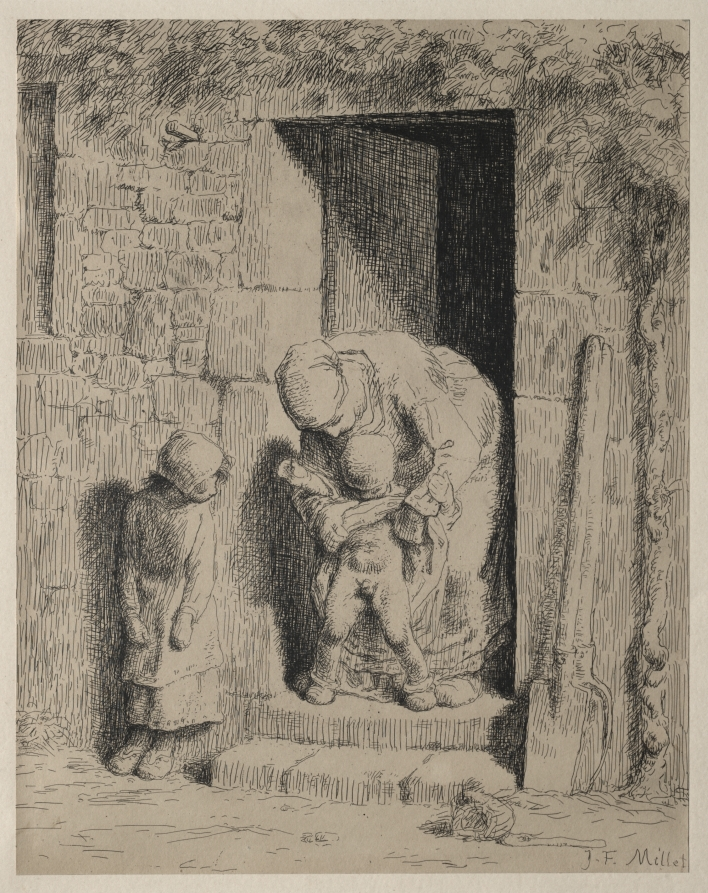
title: The Maternal Precaution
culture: France, 19th century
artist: Jean-François Millet (French, 1814–1875)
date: 1860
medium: cliché-verre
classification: Print